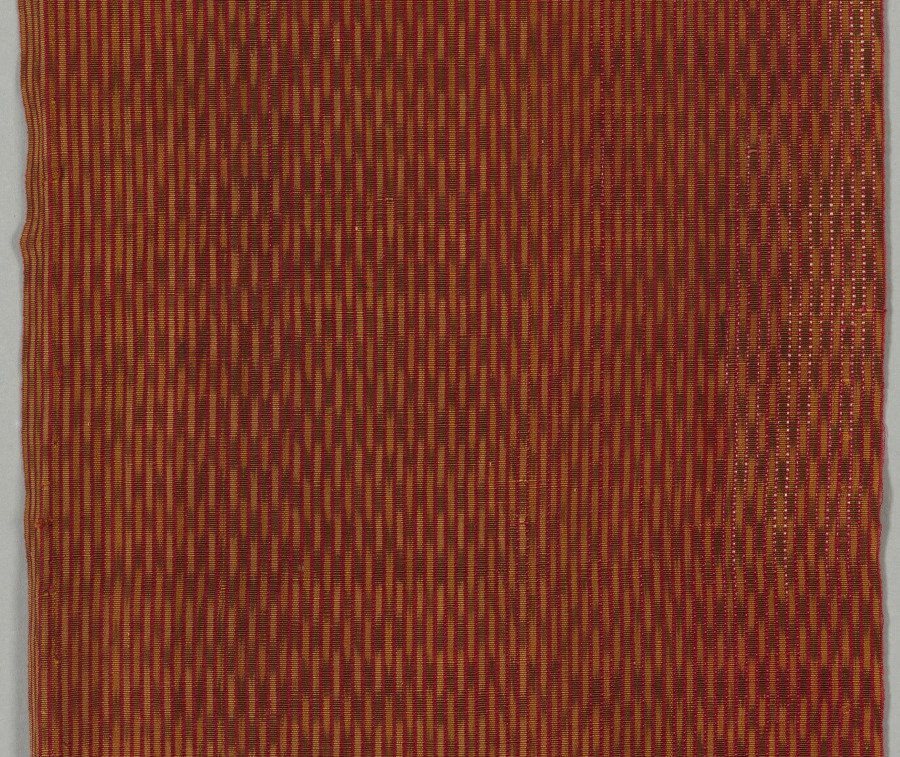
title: Fragment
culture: India, Surat, 19th century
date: 1800s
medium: tightly woven cotton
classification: Textile